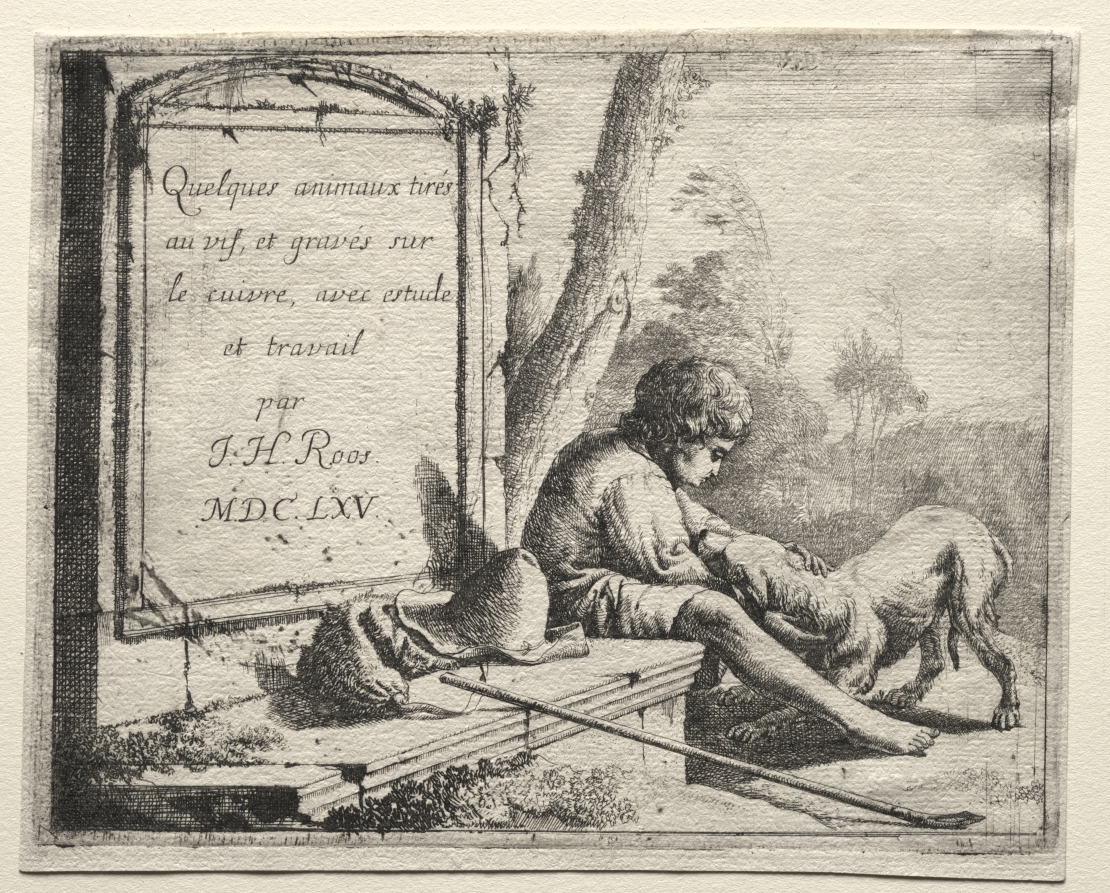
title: Title Page: Shepherd Petting his Dog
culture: Germany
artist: Johann Heinrich Roos (German, 1631–1685)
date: 1665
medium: etching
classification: Print